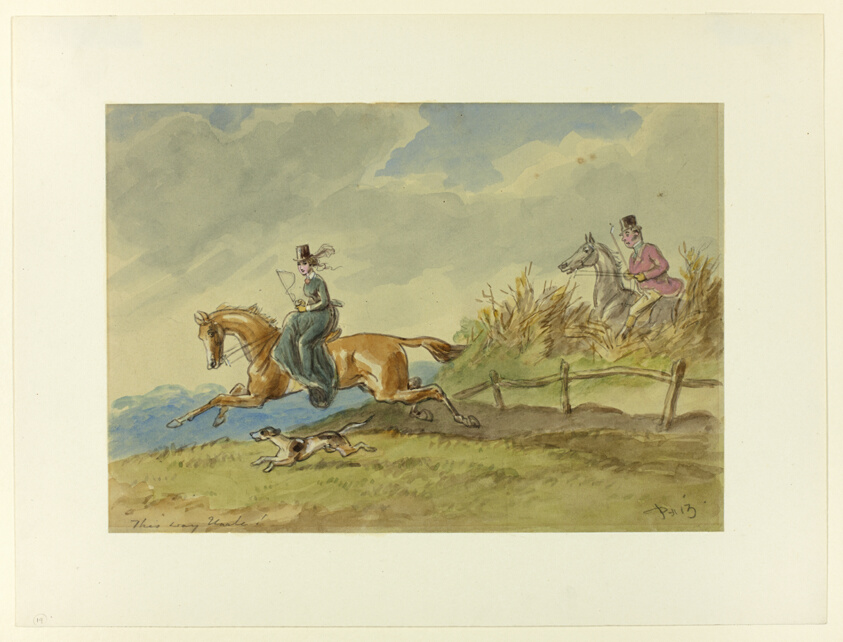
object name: Drawing and Watercolor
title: This Way Uncle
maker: Hablot Knight Browne (English, 1815-1882)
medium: Watercolor, with touches of pink gouache, heightened with touches of white gouache, over graphite, on gray wove paper, perimeter mounted on ivory wove paper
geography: England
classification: watercolor; drawings (visual works); prints and drawing